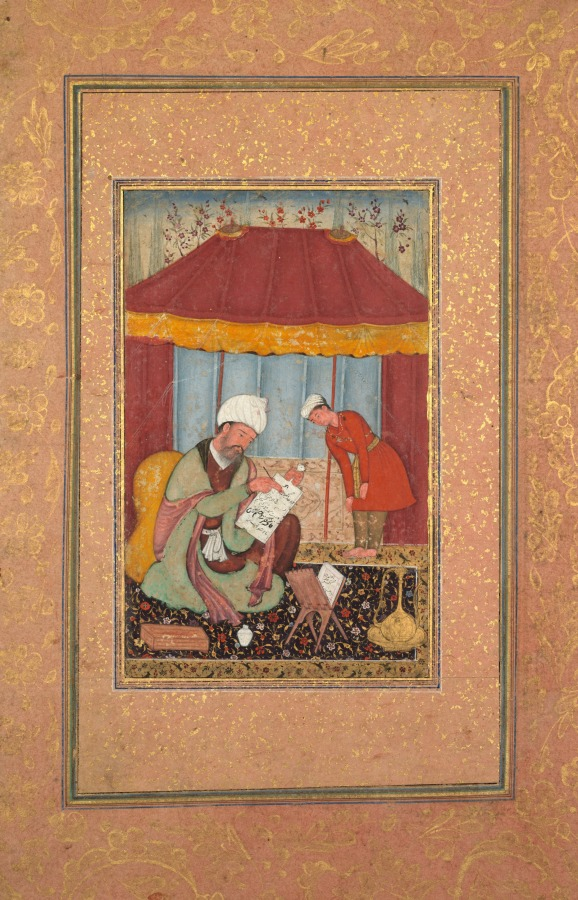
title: Teacher with his Pupil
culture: India, Mughal Dynasty (1526-1756)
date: c. 1595–1600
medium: Gum tempera and gold on paper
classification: Painting